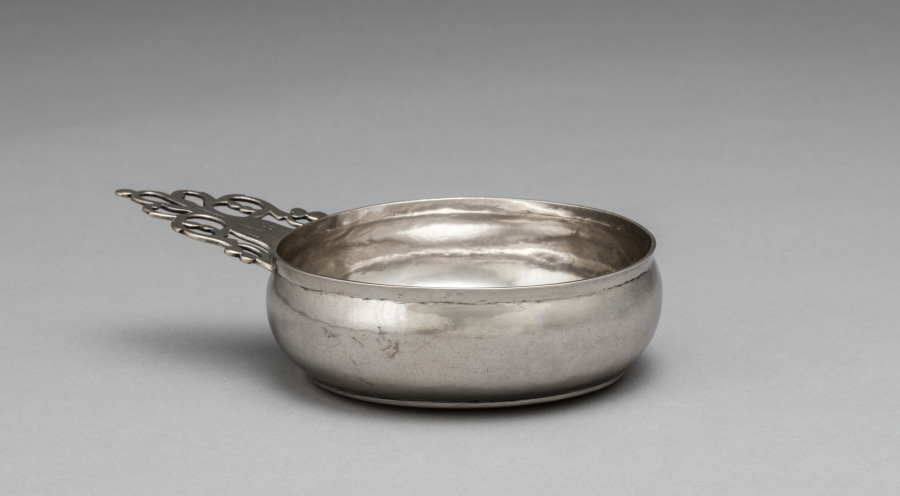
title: Porringer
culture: America, Massachusetts, Ipswich, 18th century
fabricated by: Daniel Rogers (American, 1735–1816)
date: c. 1760–1780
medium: silver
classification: Silver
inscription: engraved "K" over "E * S" in shaded block letters on top of handle. Scratched on bottom: "9 4 : 0."